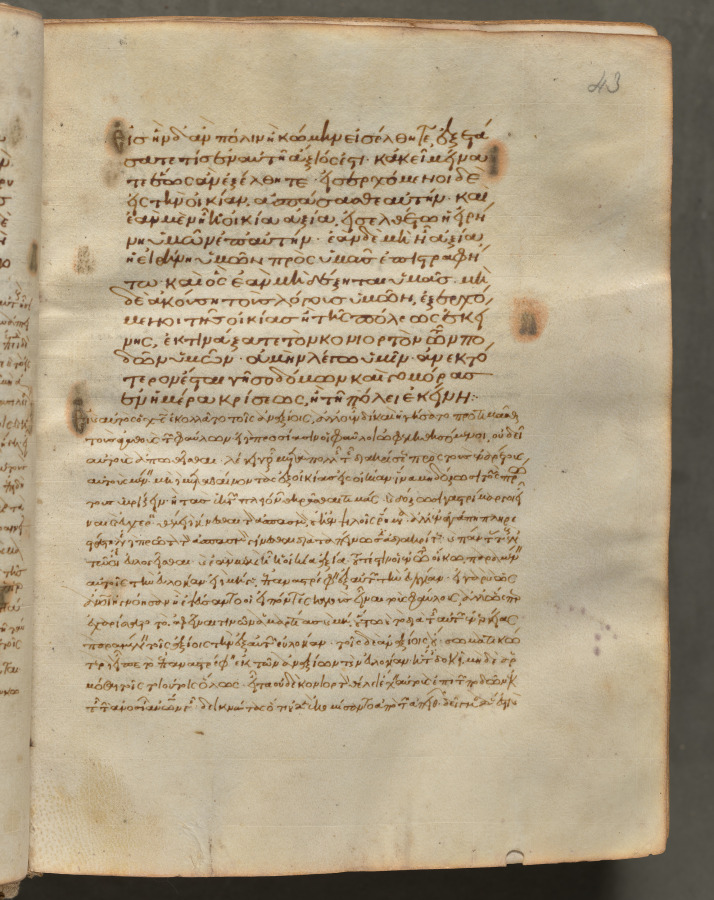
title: Text, folio 43 (recto), from a Gospel Book with Commentaries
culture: Byzantium, Constantinople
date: c. 1000–1100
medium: ink, tempera, and gold on vellum; leather binding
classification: Bound Volume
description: Each of the four gospels in this book opens on a page with brilliantly illuminated borders depicting the author of the text as well as birds-principally peacocks, symbols of the immortality of the soul-and fountains, representing the fountain of life and the salvation of the soul. This volume consists of 428 leaves with texts in Greek. Its level of sophistication suggests that it was probably written and decorated in a monastery in Constantinople.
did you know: Gospel Books were carried in procession through Byzantine churches.